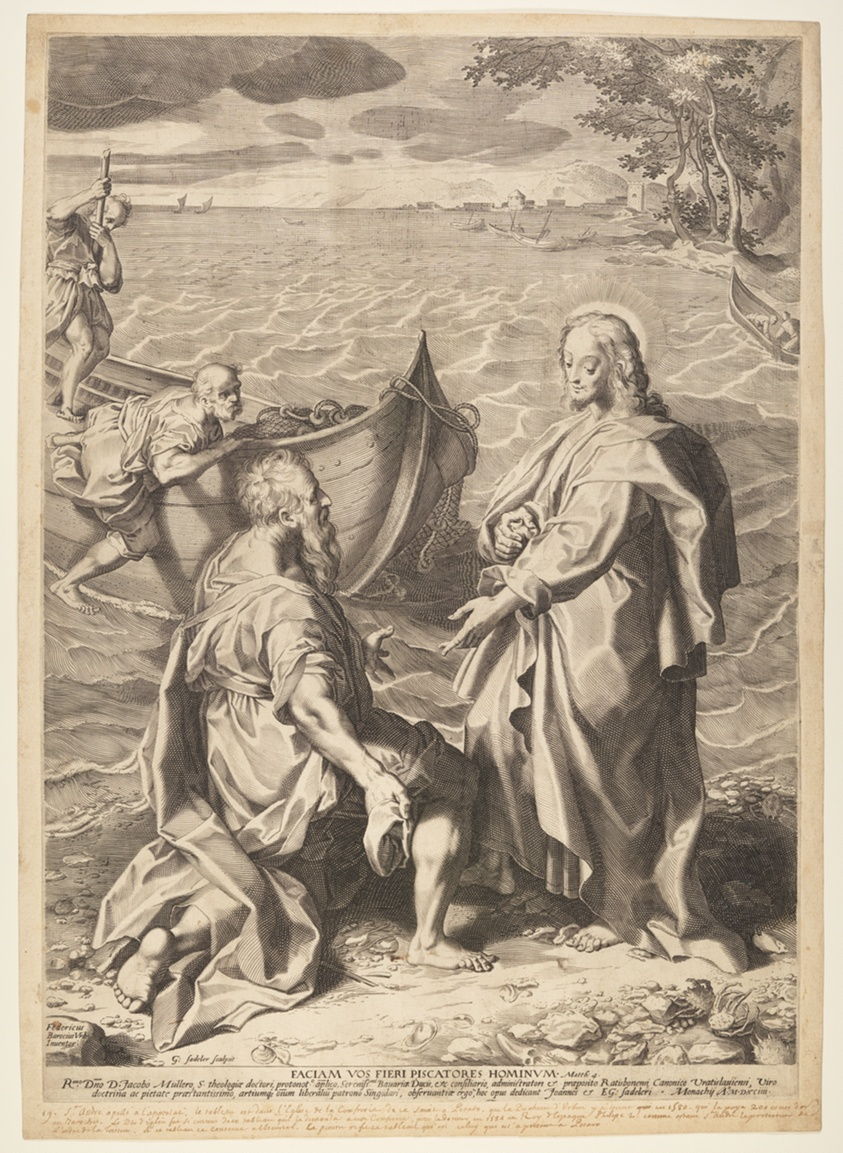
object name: Print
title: Calling of the Disciples Peter and Andrew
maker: Aegidius Sadeler II (Flemish, c. 1570–1629); after Federico Barocci (Italian, 1535–1612)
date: 1594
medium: Engraving on ivory laid paper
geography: Flanders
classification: engraving; paper; print; prints and drawing